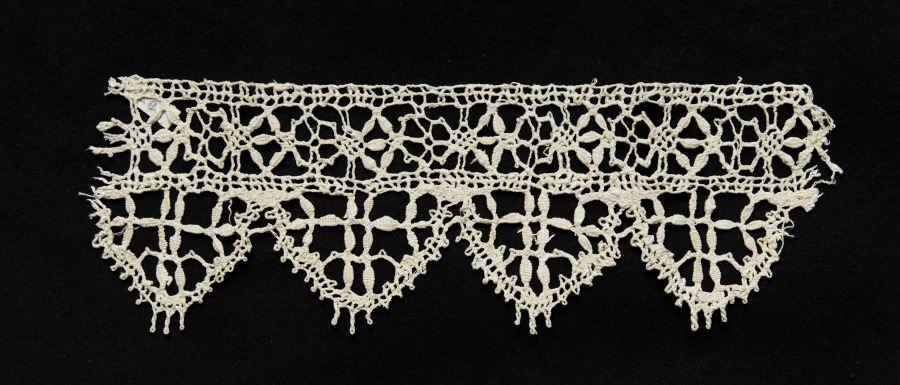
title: Lace Insertion with Edging of Points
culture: Italy, Genoa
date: 1550s-1590s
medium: Bobbin lace (needle lace (Reticella and Punto in Aria) designa)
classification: Lace